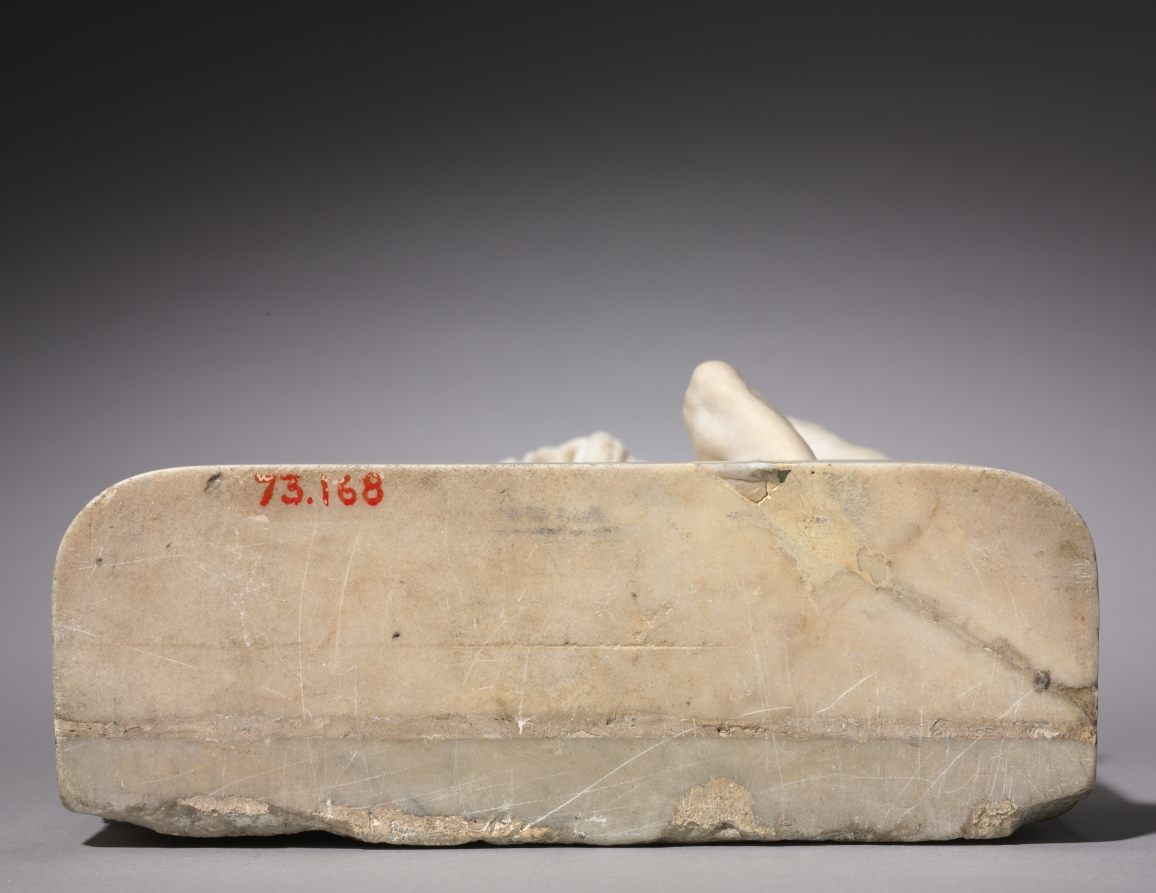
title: Philoctetes on the Island of Lemnos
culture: Italy, 16th century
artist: workshop of Giovanni Maria Mosca (Italian, 1495/99–1574)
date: c. 1510–1515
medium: marble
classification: Sculpture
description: A snake bit the Greek warrior Philoctetes en route to the Trojan War. The stench of the infected wound led the ship’s crew to abandon him on the island of Lemnos, where he fans the agonizing injury with a bird’s wing. The warrior’s noble suffering in the face of tremendous pain would have been a classical model of stoic composure, highly valued in Renaissance court culture.